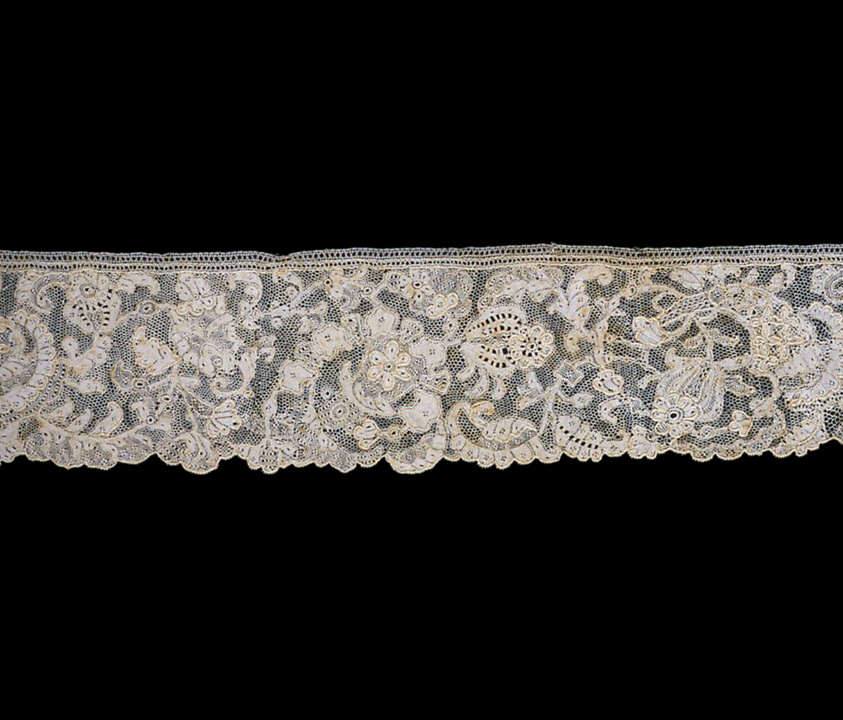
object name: Textile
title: Border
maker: France or Flanders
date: 1701/25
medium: Linen, needle lace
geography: France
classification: textile; lace - needle